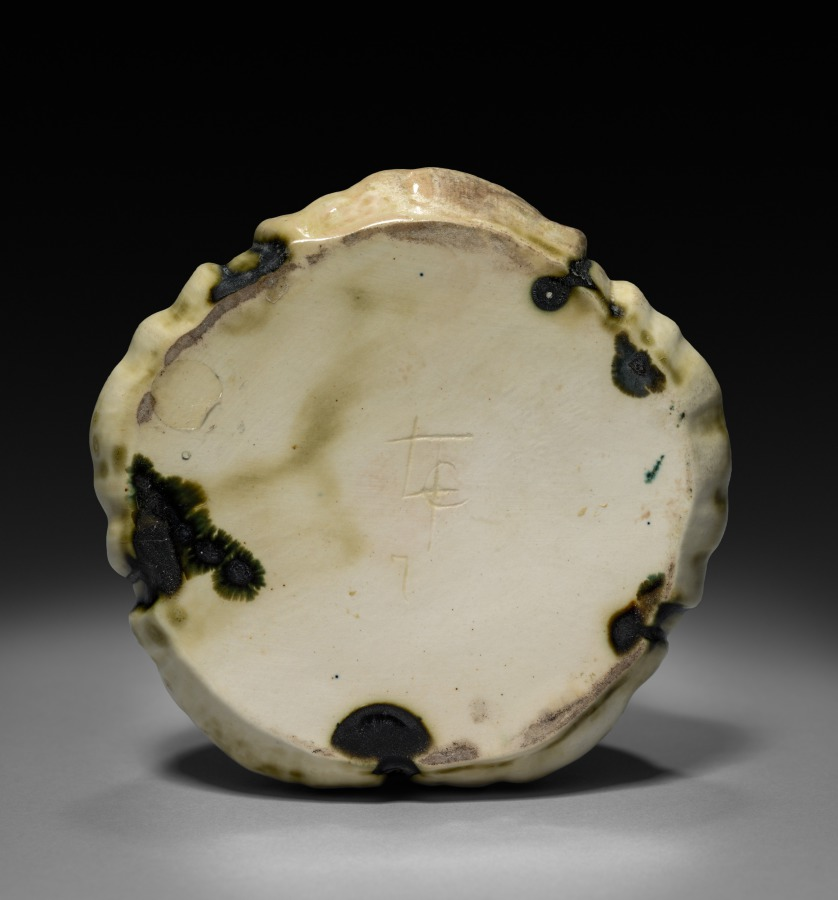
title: Artichoke Vase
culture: America, New York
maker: Tiffany Studios (United States, New York, 1902–32)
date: c. 1905–10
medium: Glazed white clay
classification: Ceramic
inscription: engraved on underside: LCT 7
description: By 1900 Louis Comfort Tiffany had expanded his empire by increasing the firm’s production of “fancy goods,” including inkstands, candlesticks, clocks, small boxes, desk sets, tea screens, and other functional objects. Along with the array of artistic glass designs from his factory in Corona, Queens, works in ceramic, bronze, other metals, and even jewelry abounded. These affordable luxury items were designed with as much thought to artistry as the great stained glass windows and lamps through which the firm enjoyed unrivaled success.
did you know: Ceramic works were Louis Comfort Tiffany's contribution to the art pottery movement of the early 1900s.